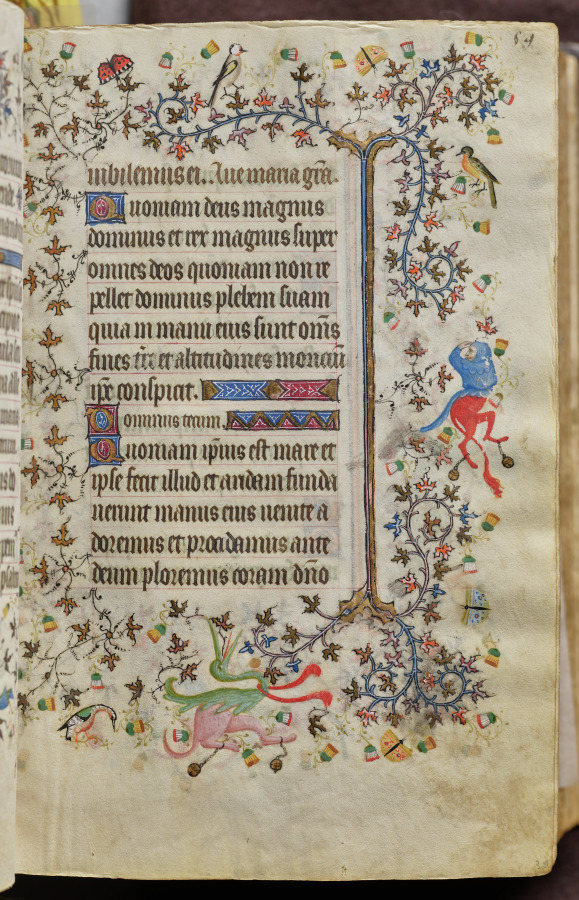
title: Hours of Charles the Noble, King of Navarre (1361-1425): fol. 30r, Text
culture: France, Paris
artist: Master of the Brussels Initials and Associates (French)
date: c. 1405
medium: ink, tempera, and gold on vellum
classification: Bound Volume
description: This precious volume was obviously highly prized by its owner, the French-born King of Navarre, who had his coat of arms painted on no less than twenty folios. Rather than directly commissioning this manuscript from a specific workshop, it seems that Charles the Noble acquired his book of hours -- perhaps ready-made for the luxury market -- while on a trip to Paris in 1404-05. A collaborative effort, six painting styles are evidenced within the pages of this codex, those of two Italians, two Frenchmen, and two Netherlanders. The painter who was responsible for the planning and decoration of the book, and who produced seventeen of the large miniatures, was a Bolognese artist known as the Master of the Brussels Initials. His principal assistant, responsible for most of the borders, was a Florentine who signed his name "Zecho" da Firenze on folio 208 verso.